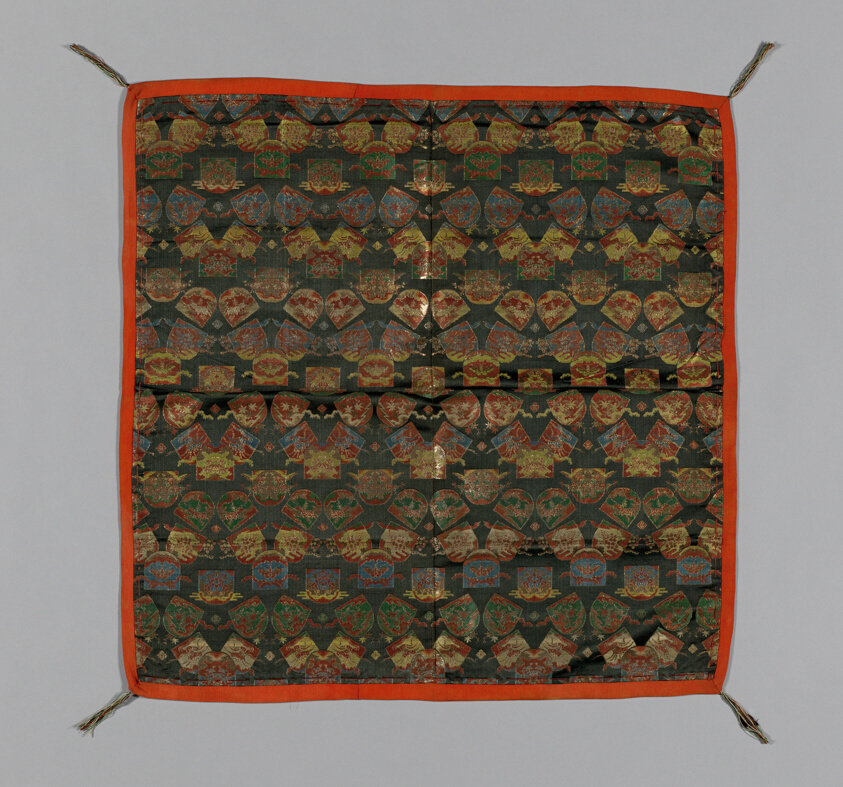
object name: Textile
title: Fukusa (Gift Cover)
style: Japanism, meiji, late edo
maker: Japan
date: late Edo period (1789–1868)/Meiji period (1868–1912), 1850/75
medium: Kinran, fancy compound satin, silk, and gilt paper; lined with red silk crepe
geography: Japan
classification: textile; weaving